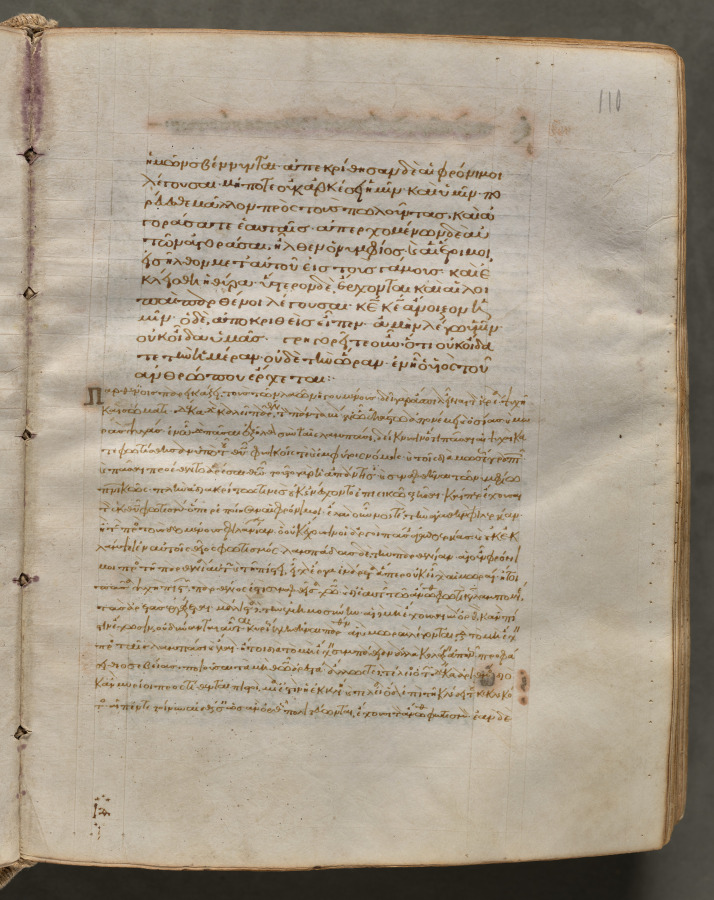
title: Text, folio 110 (recto), from a Gospel Book with Commentaries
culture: Byzantium, Constantinople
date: c. 1000–1100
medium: ink, tempera, and gold on vellum; leather binding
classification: Bound Volume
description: Each of the four gospels in this book opens on a page with brilliantly illuminated borders depicting the author of the text as well as birds-principally peacocks, symbols of the immortality of the soul-and fountains, representing the fountain of life and the salvation of the soul. This volume consists of 428 leaves with texts in Greek. Its level of sophistication suggests that it was probably written and decorated in a monastery in Constantinople.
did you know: Gospel Books were carried in procession through Byzantine churches.